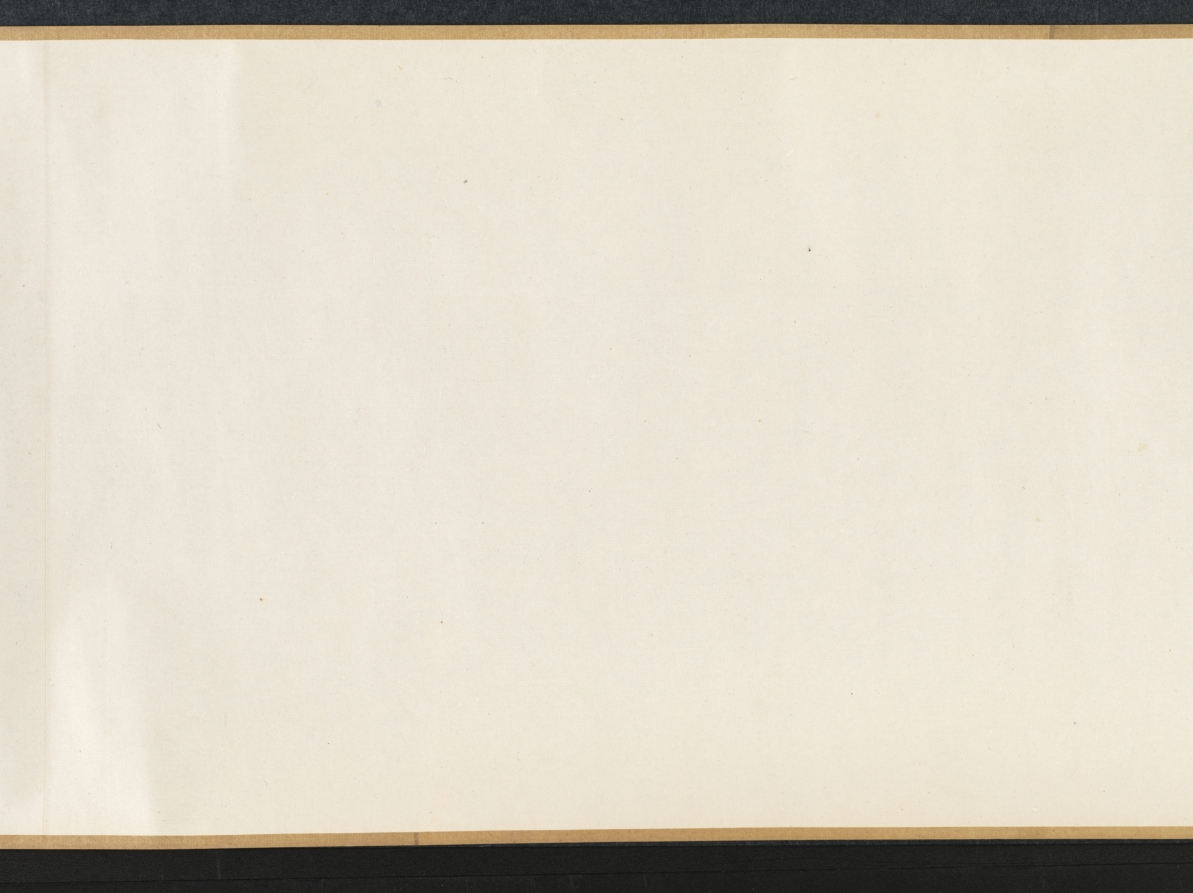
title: The Lantern Night Excursion of Zhong Kui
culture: China, Yuan dynasty (1271-1368)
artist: Yan Hui (Chinese, active 1270–1310)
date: late 1200s–early 1300s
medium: handscroll; ink and slight color on silk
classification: Painting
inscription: Artist's signature [and probable seal]: Yan Qiuyue 顏秋月 Title on frontispiece and 1 seal of Niu Shuyu 鈕樹玉 (1760–1827): Qiuyue mohuan 秋月墨幻 [Qiuyue's Ink Fantasy]. 31 additional seals: 2 of Yang Shiqi 楊士奇 (1365–1444); 2 of An Guo 安國 (1481–1534); 8 of Xiang Yuanbian 項元汴 (1525–1590); 2 of Geng Zhaozhong 耿昭忠 (1640–1686); 4 of Pu Tung 溥侗 (1870–1952); 7 of Tan Jing 譚敬 (1911–1991); 1 of Liu Ting-chih (20th c.); 5 unidentified.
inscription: An inscription by Zizhi Shanren 紫芝山人 [probably Jiang Hui 蔣惠], dated 1389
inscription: An inscription by Wu Kuan 吳寬 (1436–1504)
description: Here, the demon queller Zhong Kui leads a nightly procession of street entertainers with bare, muscular bodies and demonic faces. Some wear shabby clothes, and all perform stunts and tricks to astound and scare the viewer. In fact, a New Year custom in cities of southeast China had the poor, disguised as demons, process through the streets and play their tricks to clear households of evil spirits and welcome the spring. From right to left, a demonic figure leads the procession and beats a drum; another lifts a large rock; one stands on his hands trying to drink; one balances a jar on his elbow; three hold and wield weapons; one carries a folded chair covered by a cow’s skin; another holds Zhong Kui’s qin (zither), books, brush, and inkstone. At the end of the scroll, two figures offer a cup and bottle of wine to Zhong Kui, who lifts his hand in command.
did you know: Zhong Kui was an ancient ghostbuster.